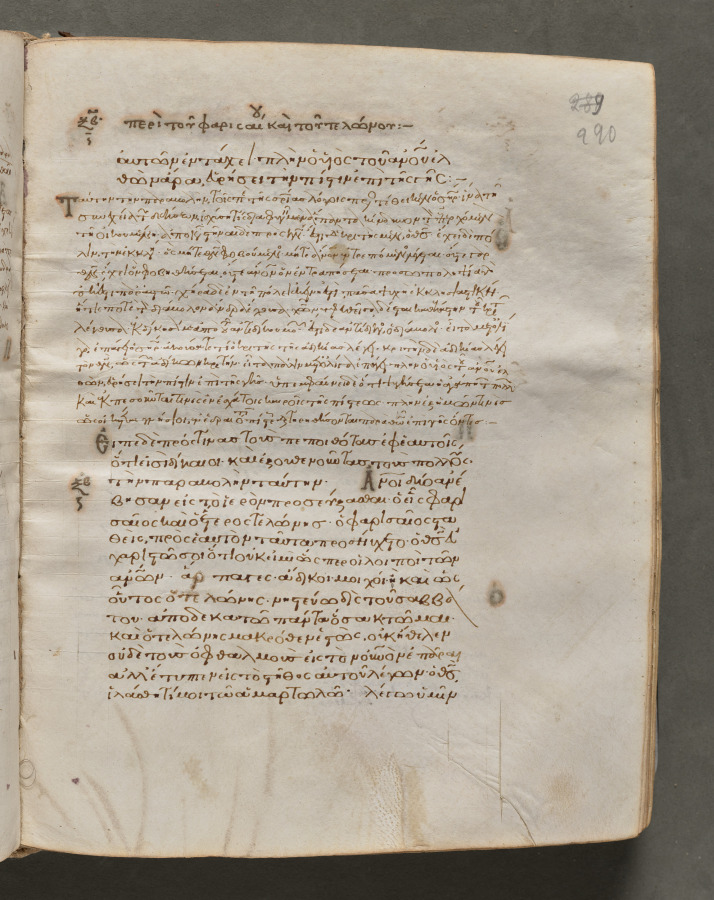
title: Text, folio 290 (recto), from a Gospel Book with Commentaries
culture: Byzantium, Constantinople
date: c. 1000–1100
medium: ink, tempera, and gold on vellum; leather binding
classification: Bound Volume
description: Each of the four gospels in this book opens on a page with brilliantly illuminated borders depicting the author of the text as well as birds—principally peacocks, symbols of the immortality of the soul—and fountains, representing the fountain of life and the salvation of the soul. This volume consists of 428 leaves with texts in Greek. Its level of sophistication suggests that it was probably written and decorated in a monastery in Constantinople.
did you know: Gospel books were carried in procession through Byzantine churches.